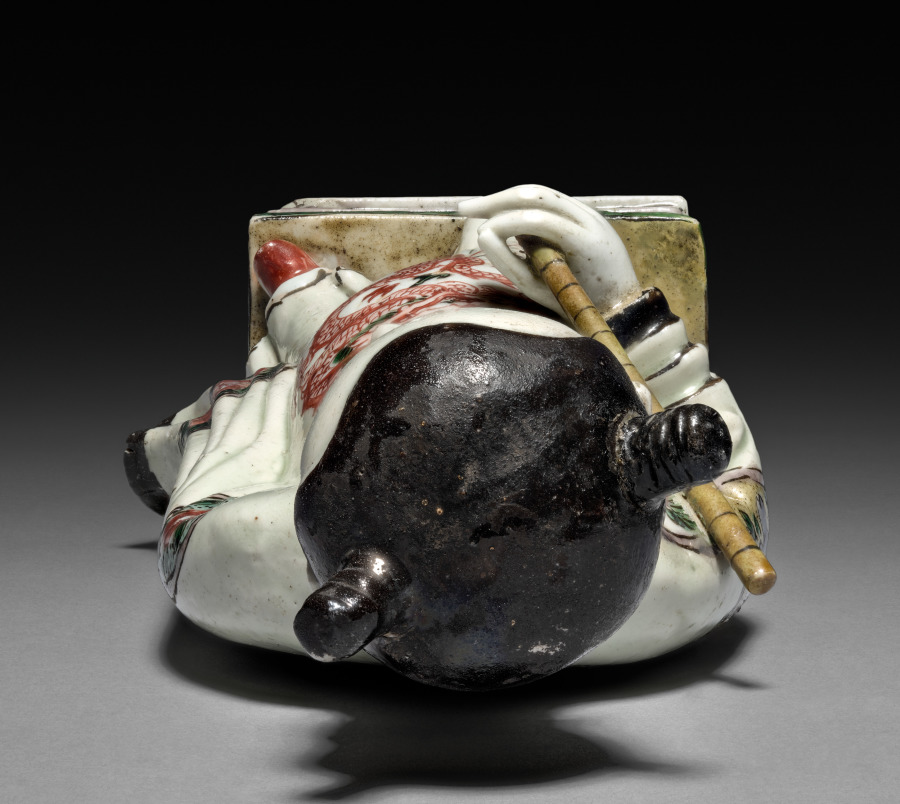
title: Daoist Immortal Han Xiangzi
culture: China, Jiangxi province, Jingdezhen kilns, Qing dynasty (1644-1911), Kangxi reign (1662-1722)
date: 1662–1722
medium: porcelain with famille verte overglaze enamel decoration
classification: Ceramic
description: One of the Eight Immortals, Han Xiangzi was said to be the nephew of the famous Tang dynasty poet Han Yu (768–824). He is usually shown as a young boy holding a flute. Han is wearing a white robe decorated with peonies, hinting at his identity as the patron of florists and his legendary ability to make peonies bloom in winter. A four-clawed dragon, a decorative motif typically used for imperial nobility and certain high-ranking officials, decorates Han’s robe.